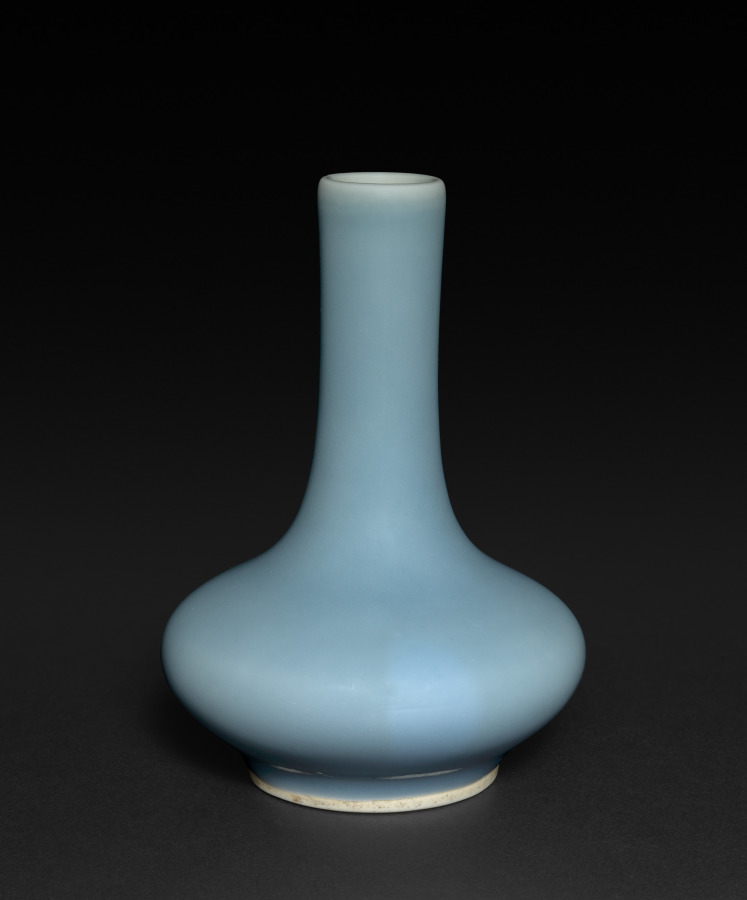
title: Bottle-Shaped Vase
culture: China, Qing dynasty (1644-1911), Kangxi reign (1661-1722)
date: 1661–1722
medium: porcelain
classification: Ceramic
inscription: 大清康熙年製